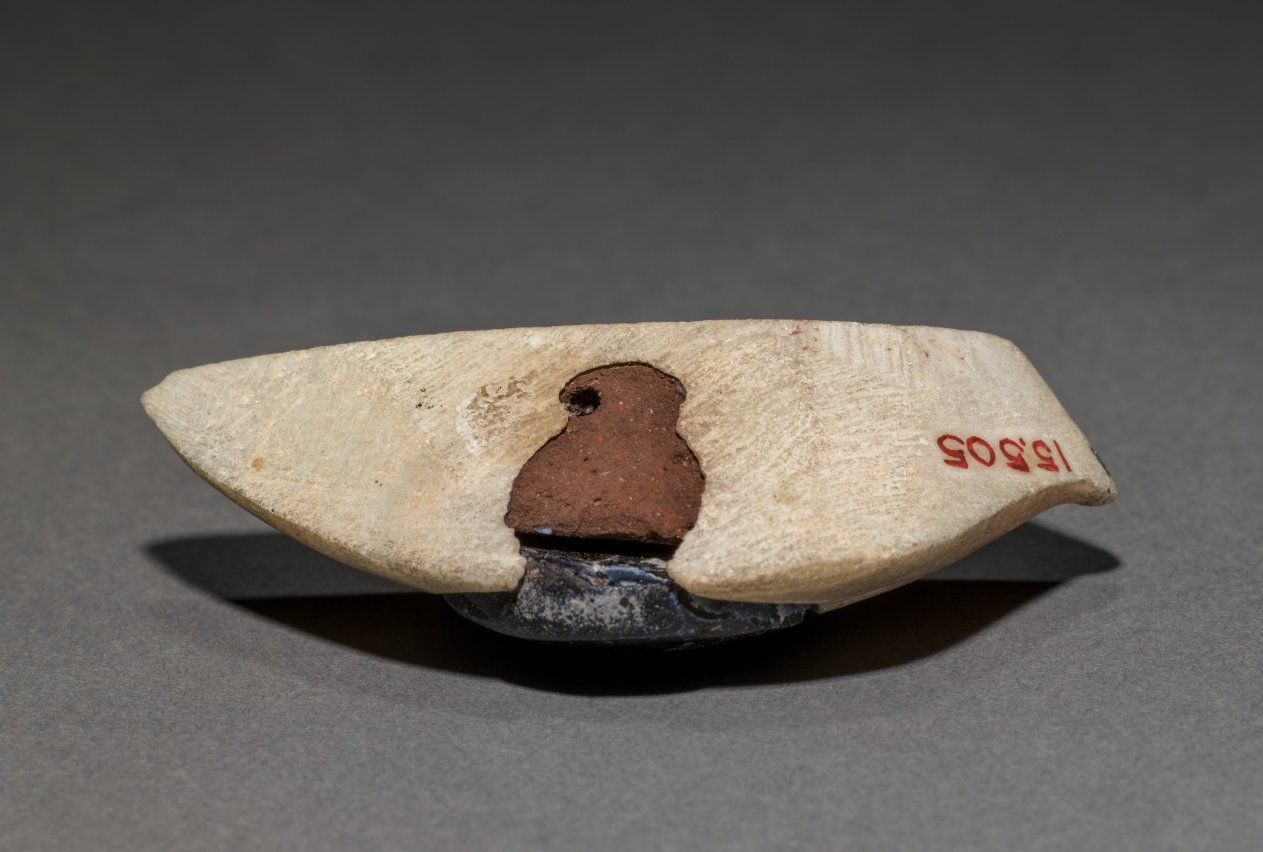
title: Inlay Eye from Coffin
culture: Egypt, Middle Kingdom (2040–1648 BCE), Dynasty 12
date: 1980–1801 BCE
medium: travertine and obsidian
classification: Funerary Equipment